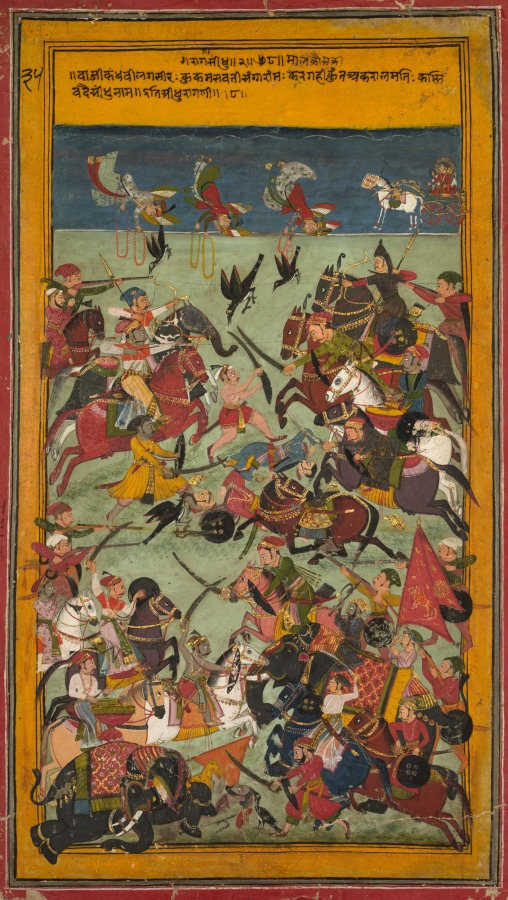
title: Sindhu Raga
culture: Northwestern India, Rajasthan, Rajput Kingdom of Mewar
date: c. 1720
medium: Gum tempera and ink on paper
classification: Painting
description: The inscription at the top identifies this painting as Sindhu Raga, which is the raga (or musical mode) of heroic sentiment. The painting is meant to elicit the same feelings in the viewer as a rousing piece of music played in the Sindhu key. Paintings of Sindhu Raga depict battle scenes. In this example, the composition conveys the chaotic melee and violence of war. Heads are being lopped off; carrion birds swoop down unfazed. Above the horizon against the sky at the far right is the god of war, Karttikeya, in his chariot. Three angels carry garlands for the dead.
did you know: Most of the warriors are on horseback and are armed with bows and arrows, swords, lances, and shields, as well as rifles. Two elephants appear in the foreground.